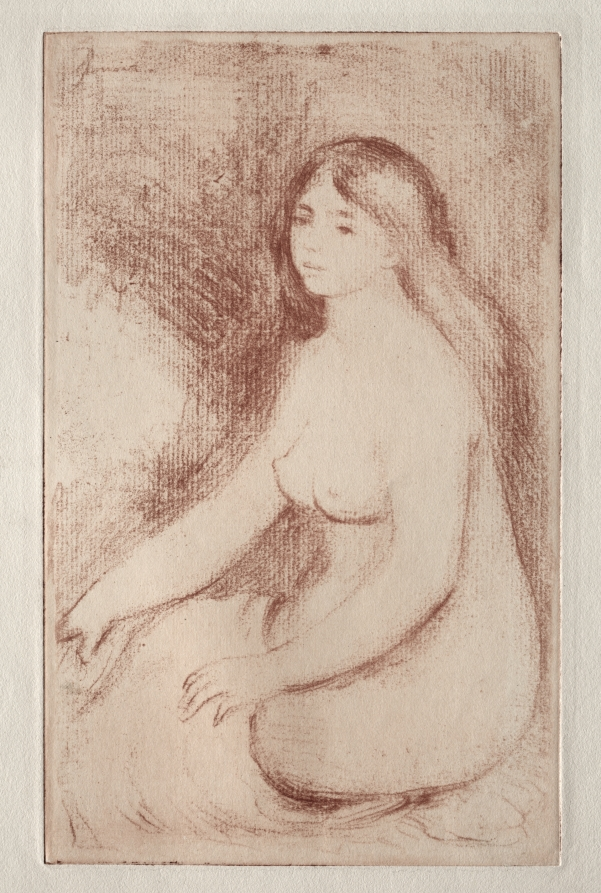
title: Baigneuse assise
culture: France, late 19th-early 20th Century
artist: Pierre-Auguste Renoir (French, 1841–1919)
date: c. 1905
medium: softground etching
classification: Print